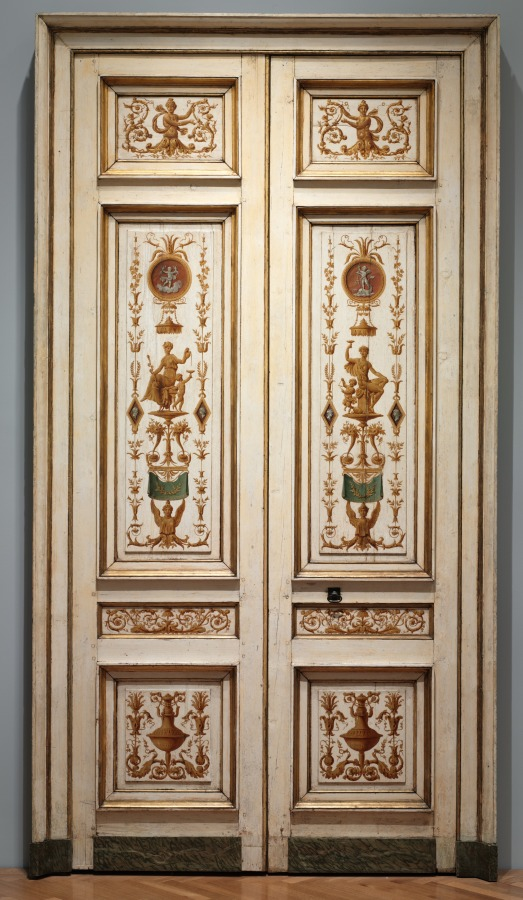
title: Double-leaf Doors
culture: France, 18th century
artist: Pierre Rousseau (French, 1751–1829)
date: 1790s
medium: oil on wood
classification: Painting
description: Shifts in style and taste often result in changes to original architectural details. Rousseau painted these doors with imitation dark wood grain. Another craftsman later scraped off the dark color surrounding the classical designs. This set was conserved in 1979 and retains more traces of the original graining than the other doors by this artist in the museum's collection.